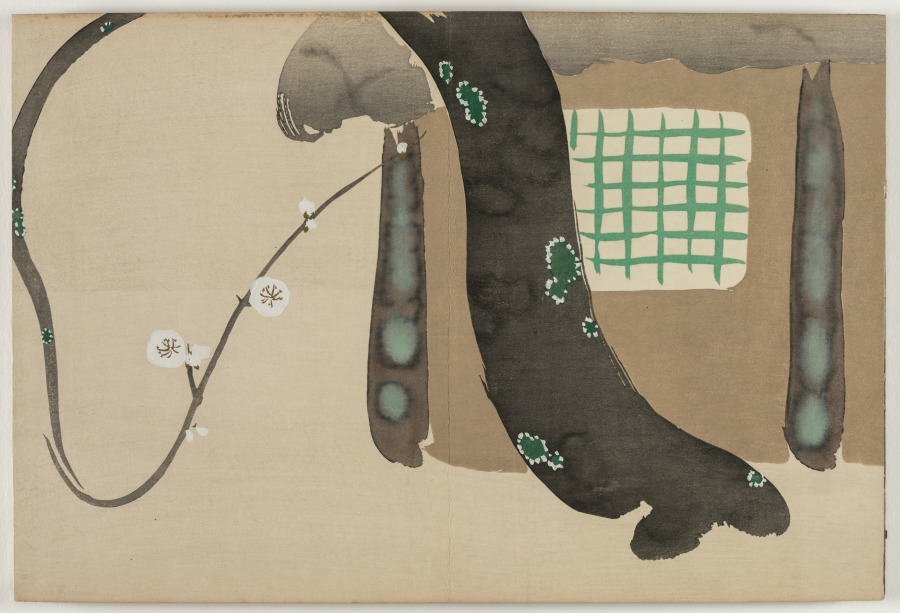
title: Flowers of a Hundred Worlds (Momoyogusa): Plum by the Eaves (Nokiba no ume)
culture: Japan, Meiji period (1868–1912)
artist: Kamisaka Sekka (Japanese, 1866–1942)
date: 1909–10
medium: color woodcuts with gold and silver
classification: Bound Volume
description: This print from a set of three woodblock printed albums displays the graphic design prowess of Kamisaka Sekka. The images were first distributed one by one to subscribers to the series but later were reissued in bound form, like this book, for mass consumers. Each print features a vignette taken from nature or Japanese literature. Many of the scenes have a long history in Japan, originating in the 900s or 1000s and having been interpreted by all manner of artists since that time. Sekka’s selections hew closely to precedents from the Rinpa style originated by painter Tawaraya Sōtatsu (c. 1570–c. 1640) and calligrapher Hon’ami Kōetsu (1558–1637).